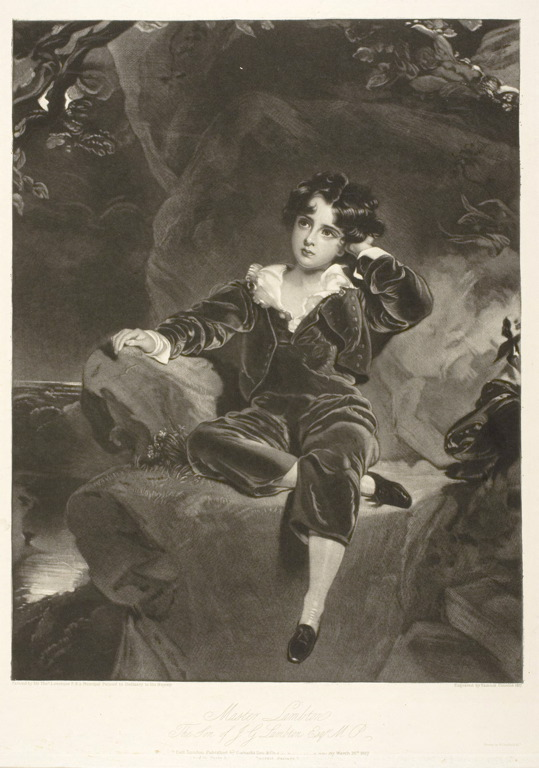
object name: Print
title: Master Lambton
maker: Samuel Cousins (English, 1801-1887); after Sir Thomas Lawrence (English, 1769-1830); published by P. D. Colnaghi & Company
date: published March 26, 1827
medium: Mezzotint on paper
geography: England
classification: mezzotint; print; prints and drawing